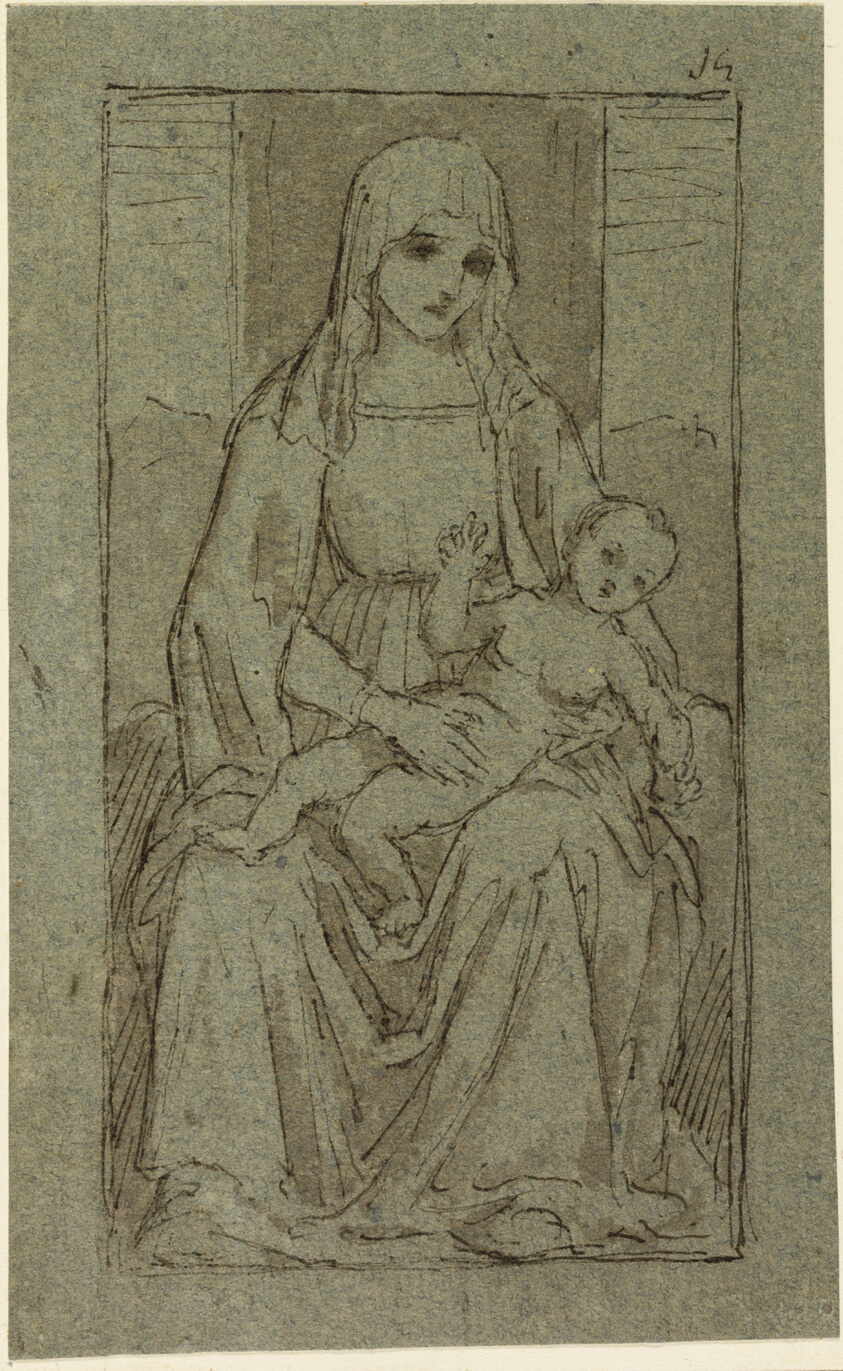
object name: Drawing and Watercolor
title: Virgin and Child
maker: After Giovanni Bellini; Italian, c. 1431-1516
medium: Pen and brown ink, and brush and brown wash, on blue laid paper, edge mounted to cream wove card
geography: Italy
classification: ink and wash; drawings (visual works); prints and drawing